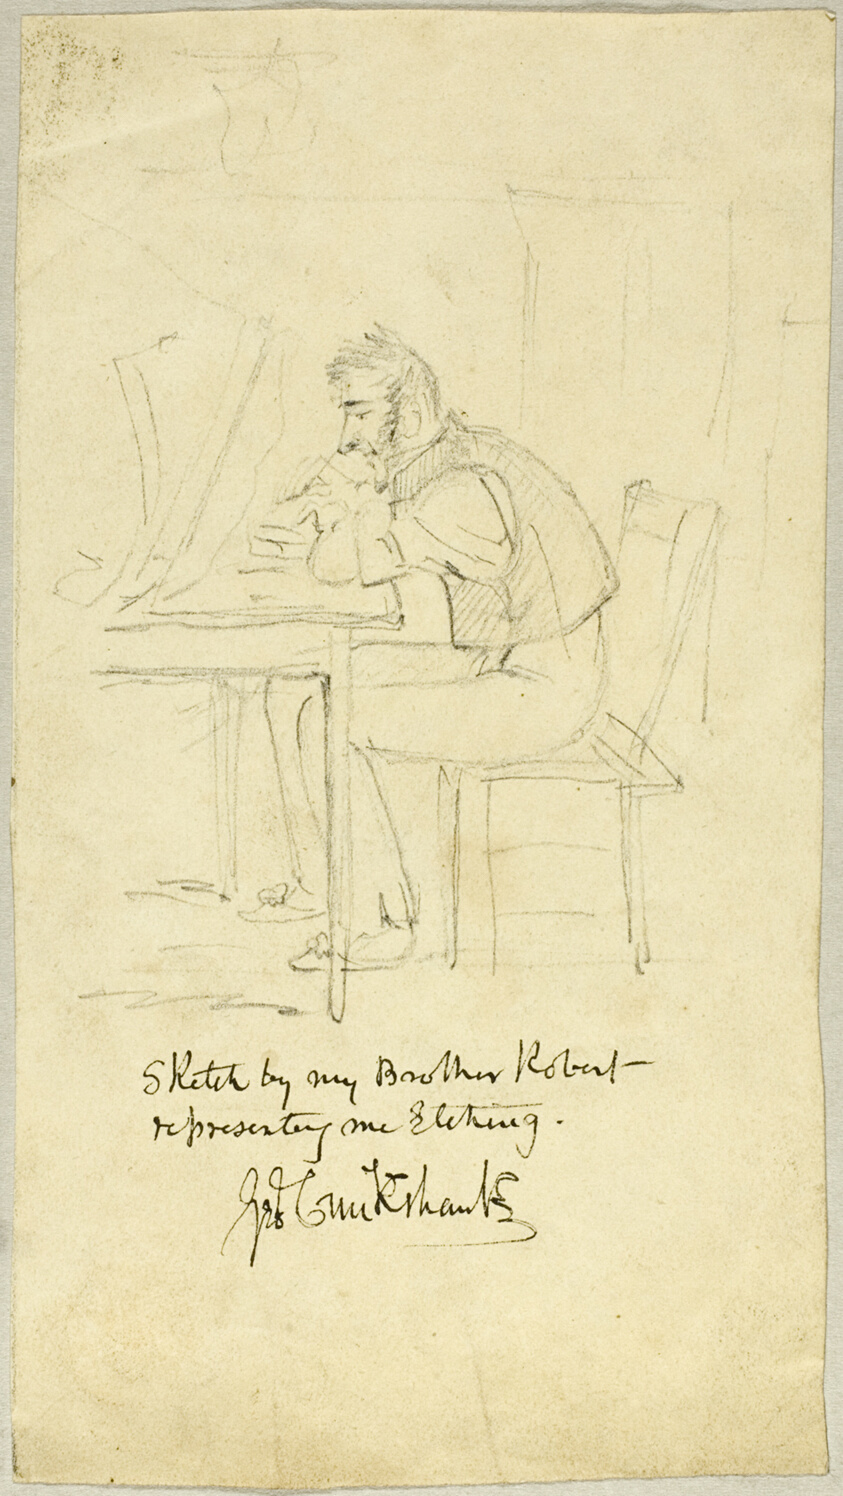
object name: Drawing and Watercolor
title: George Cruikshank Making an Etching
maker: Isaac Robert Cruikshank (English, 1789-1856); George Cruikshank (English, 1792-1878)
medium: Graphite, on cream wove paper, tipped on gray wove paper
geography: England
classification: graphite; drawings (visual works); prints and drawing